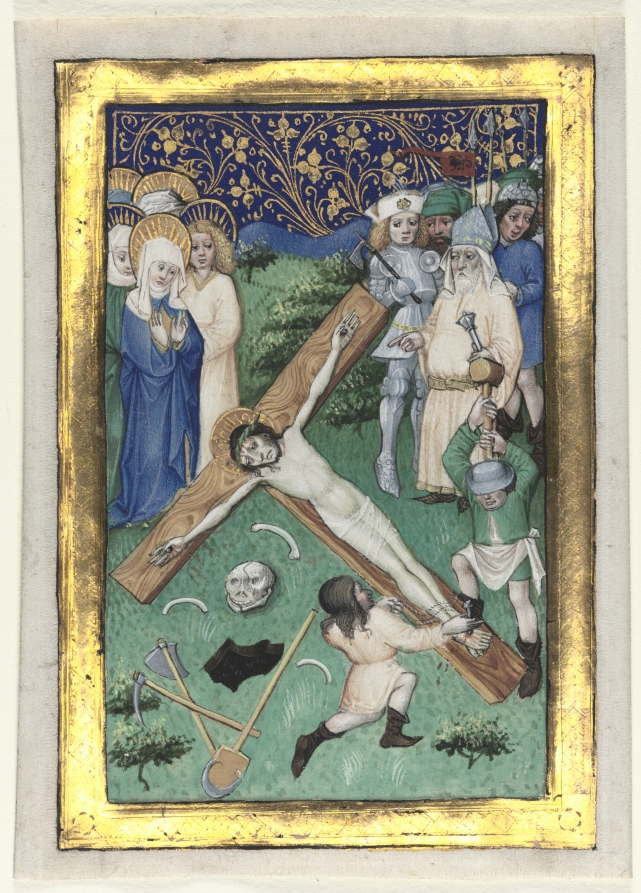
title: Leaf from a Book of Hours: Christ Being Nailed to the Cross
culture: Austria, Vienna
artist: Master of the Maximilian Schoolbooks (Austrian)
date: c. 1465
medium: ink, tempera, and gold on vellum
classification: Manuscript